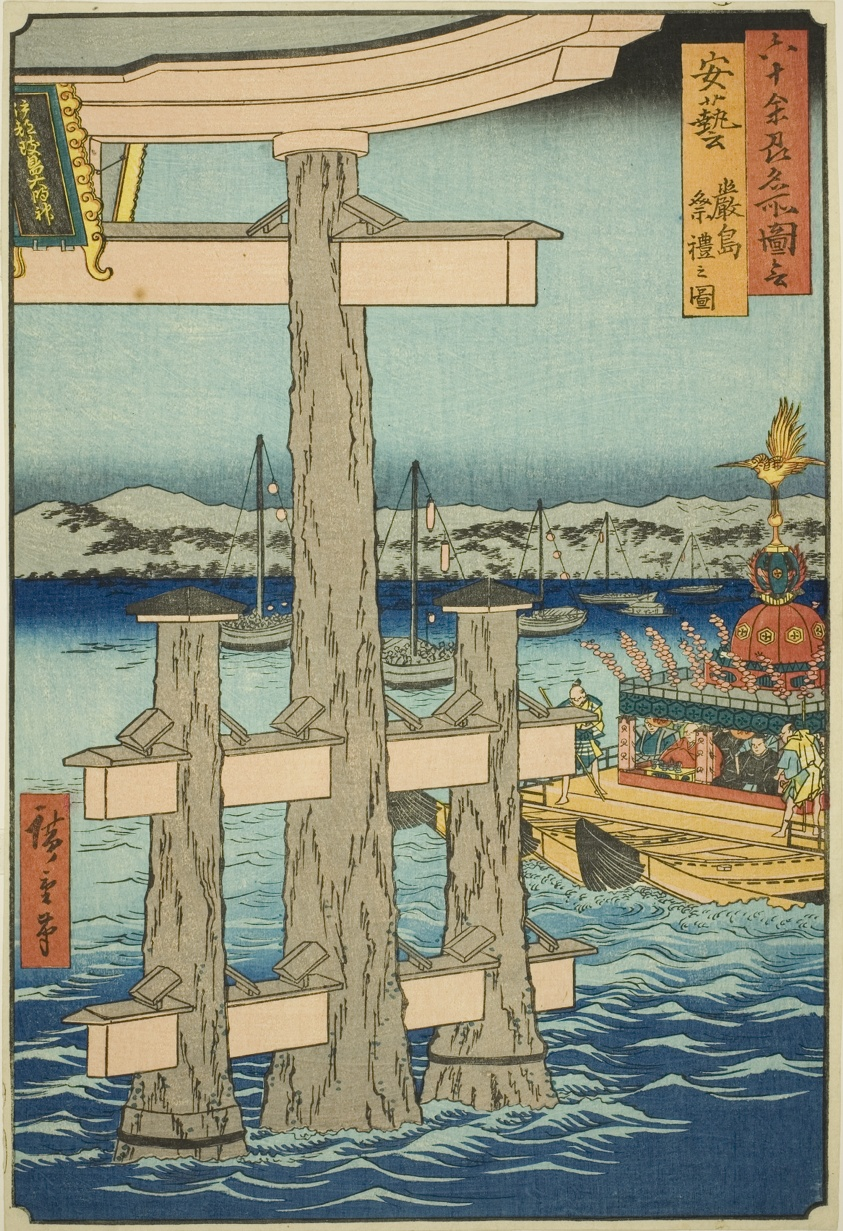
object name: Print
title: Aki Province: Festival at the Itsukushima Shrine (Aki, Itsukushima sairei no zu), from the series "Famous Places in the Sixty-odd Provinces (Rokujuyoshu meisho zue)"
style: Japanese (culture or style)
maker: Utagawa Hiroshige 歌川 広重; Japanese, 1797-1858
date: 1853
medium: Color woodblock print; oban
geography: Japan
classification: woodblock print; print; asian art